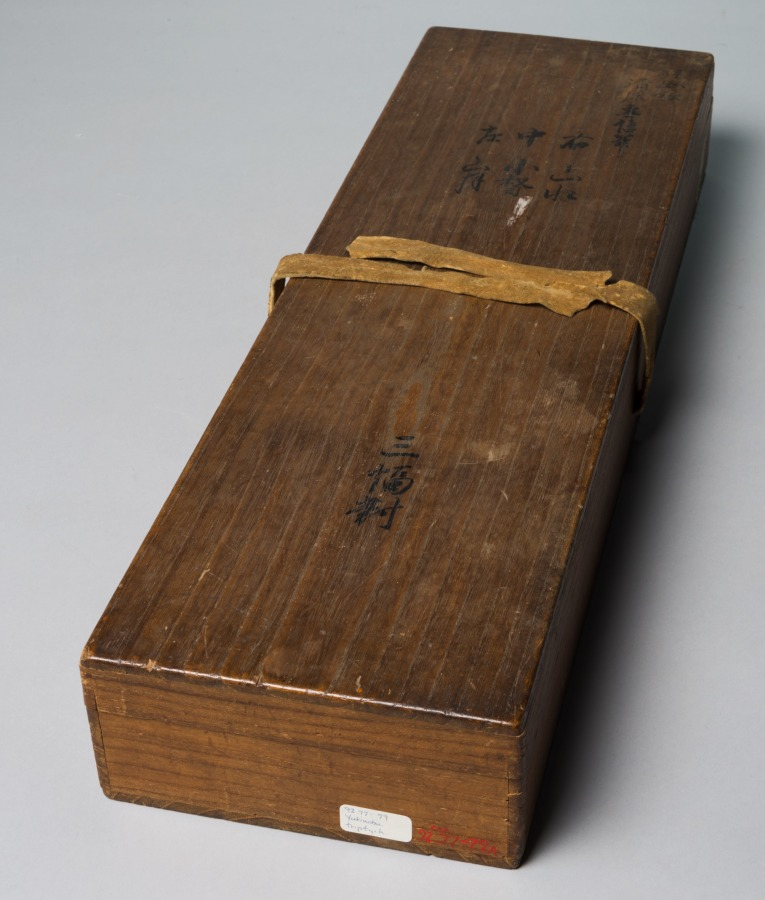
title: Minamoto no Nakakuni Visits Lady Kogō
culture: Japan, Edo period (1615–1868)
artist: Kiyohara Yukinobu (Japanese, 1643–1682)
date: late 1600s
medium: Triptych of hanging scrolls; ink and color on silk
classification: Painting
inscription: 款記「清原氏女雪信筆」/「清原女」朱文八角印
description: An aristocrat rides up a path to a residence where a woman plays a koto, a stringed instrument. The central composition is flanked on the right by a day-lit spring scene, and on the left by a nocturnal autumnal scene. The triptych presents an episode from The Tale of the Heike in which Minamoto no Nakakuni is sent by the emperor to look for Lady Kogō.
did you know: The Tale of the Heike chronicles the conflict between the Taira (Heike) and Minamoto (Genji) families in the late 12th century.